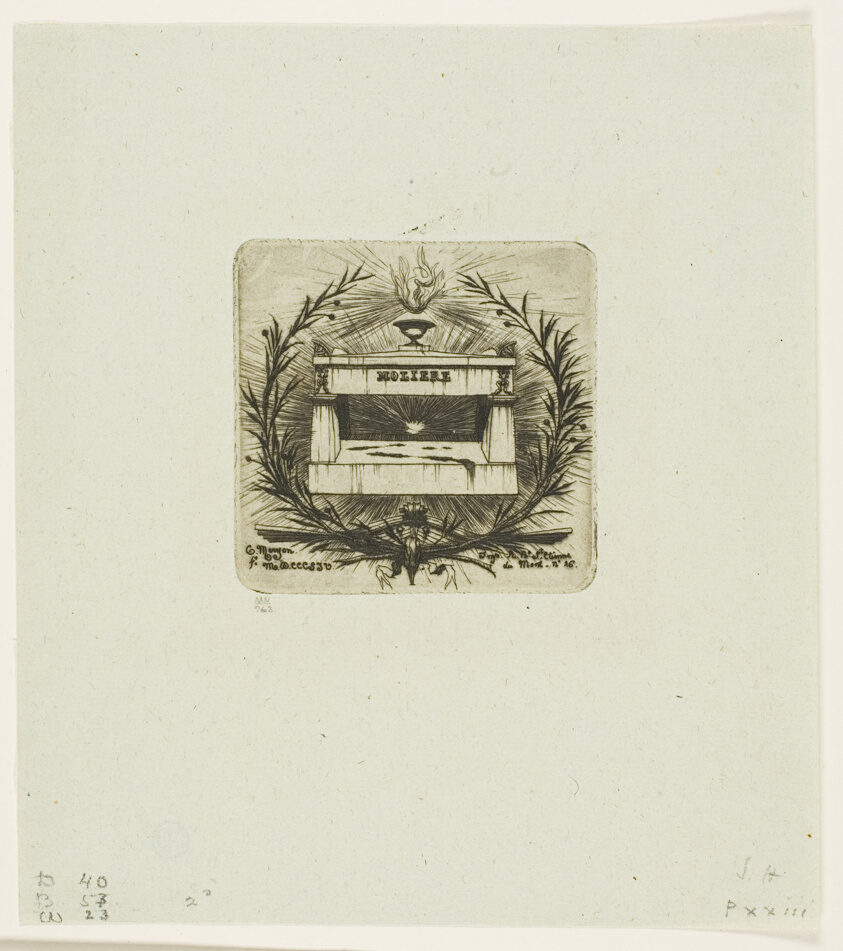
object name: Print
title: Molière's Tomb, Père-Lachaise Cemetery, Paris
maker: Charles Meryon (French, 1821-1868)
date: 1854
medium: Etching in warm black on verdâtre (greenish) laid paper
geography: France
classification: etching; print; prints and drawing